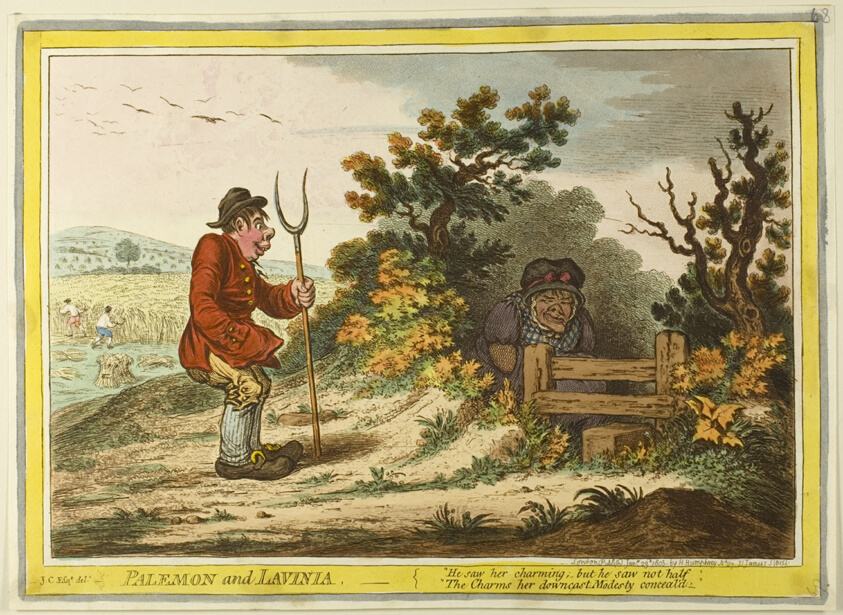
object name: Print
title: Palemon and Lavinia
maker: James Gillray (English, 1756-1815); published by Hannah Humphrey (English, c. 1745-1818)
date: published January, 1805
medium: Hand-colored etching, slightly aquatinted on paper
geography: England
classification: etching; print; prints and drawing